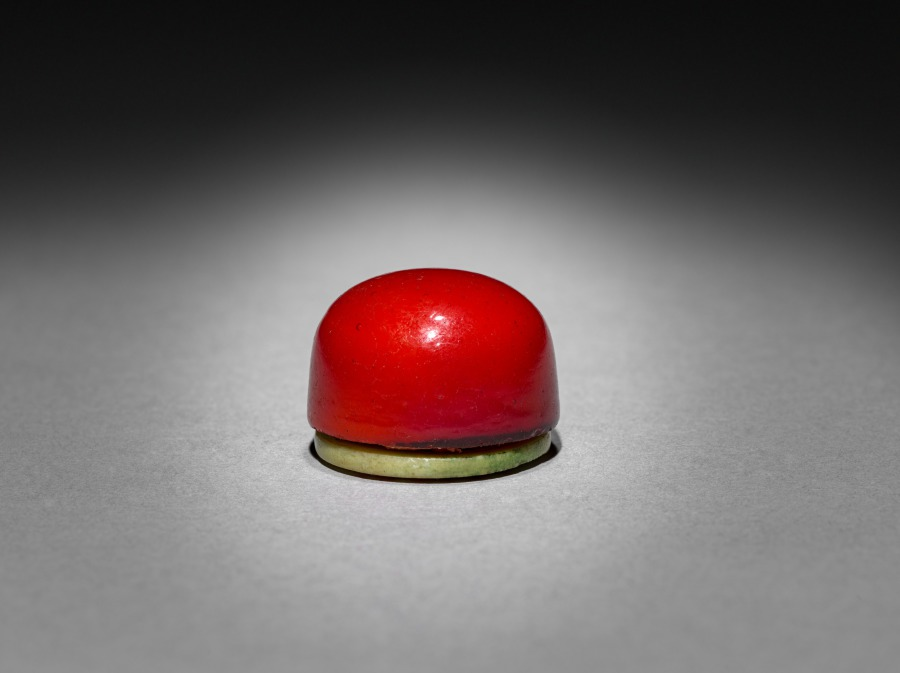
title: Snuff Bottle with Stopper (stopper)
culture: China, Qing dynasty (1644-1911)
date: 1800s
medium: glass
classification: Glass